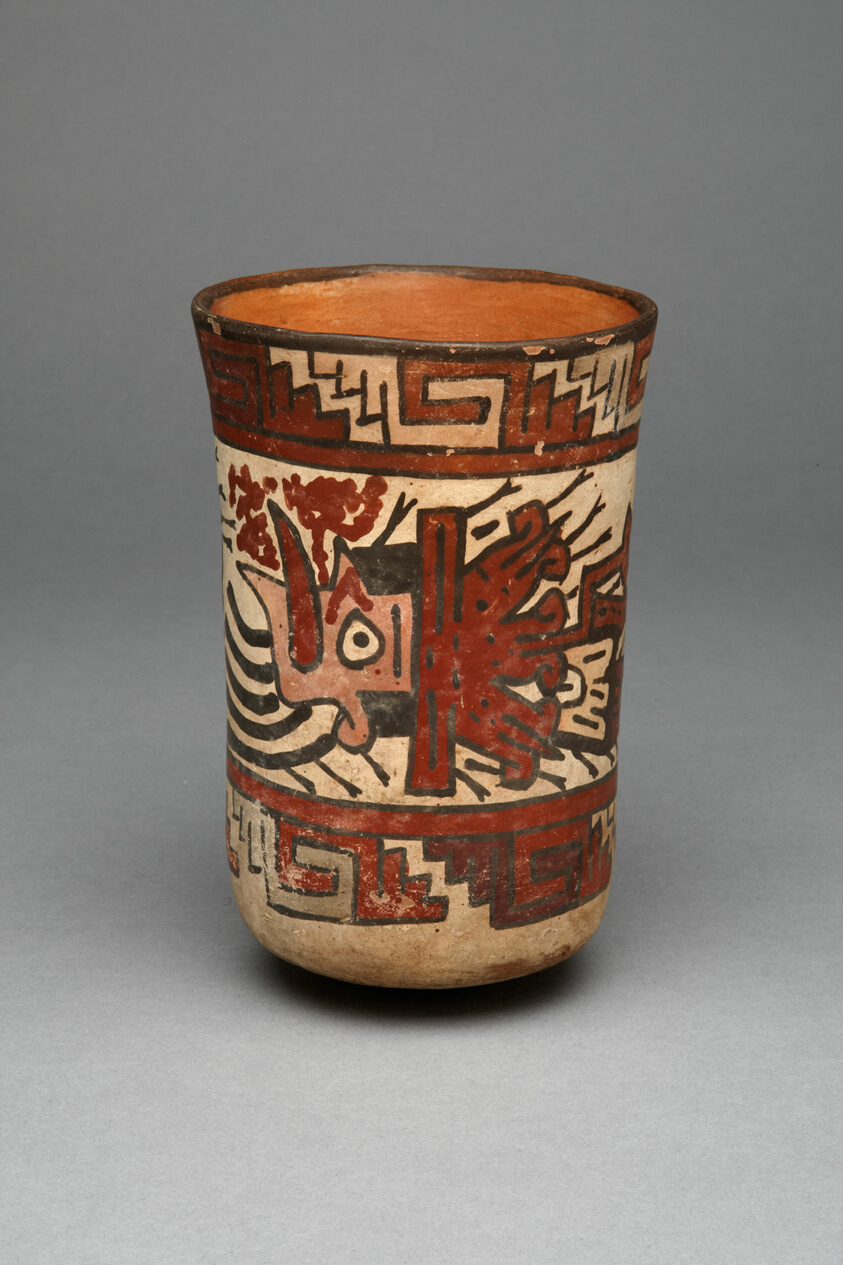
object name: Vessel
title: Beaker Depicting a Decapitated Head Wearing an Intricate Headdress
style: nazca, early intermediate period, Pre-Columbian, americas, Arts of the Americas, andean, andes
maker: Nazca; South coast, Peru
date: 180 BCE–500 CE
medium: Ceramic and pigment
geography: Nazca Valley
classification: earthenware; art of the americas; ceramics; vessel